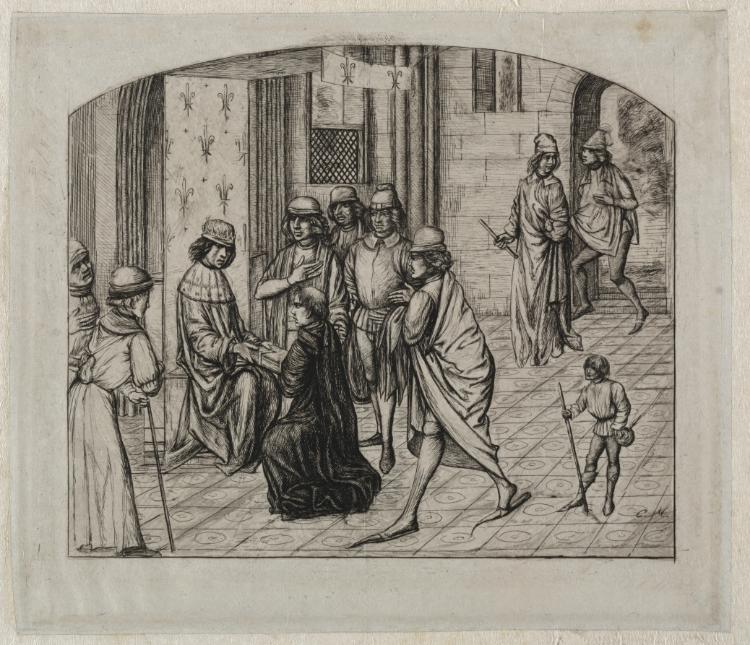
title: The Printed Work of the Latin Author, Valerius Maximus, Being Presented to King Louis XI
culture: France, 19th century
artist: Charles Meryon (French, 1821–1868)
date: 1860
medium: etching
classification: Print